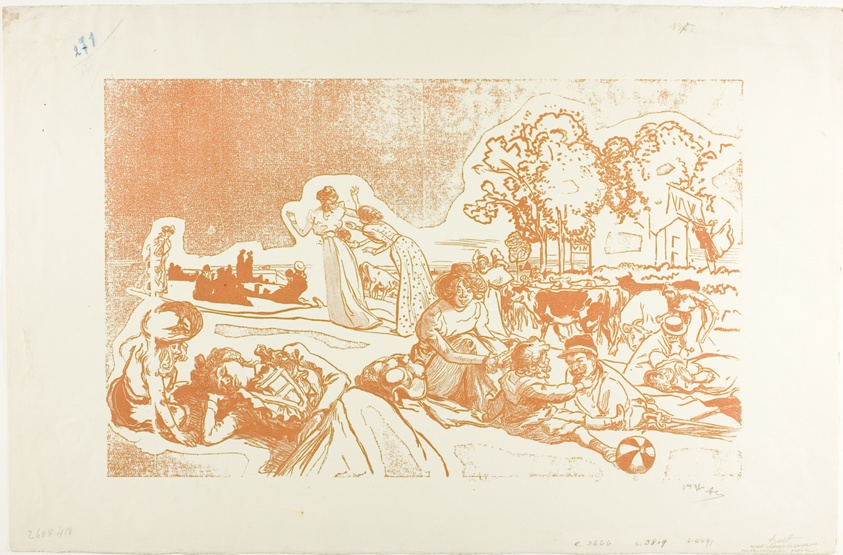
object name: Print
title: Modern Bucolic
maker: Louis Auguste Lepère (French, 1849-1918); commissioned by and final state published by Graphischen Künste (Austrian, active 19th-20th centuries)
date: 1901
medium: Woodcut in red-brown from one block on cream wove paper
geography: France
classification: woodcut; print; prints and drawing